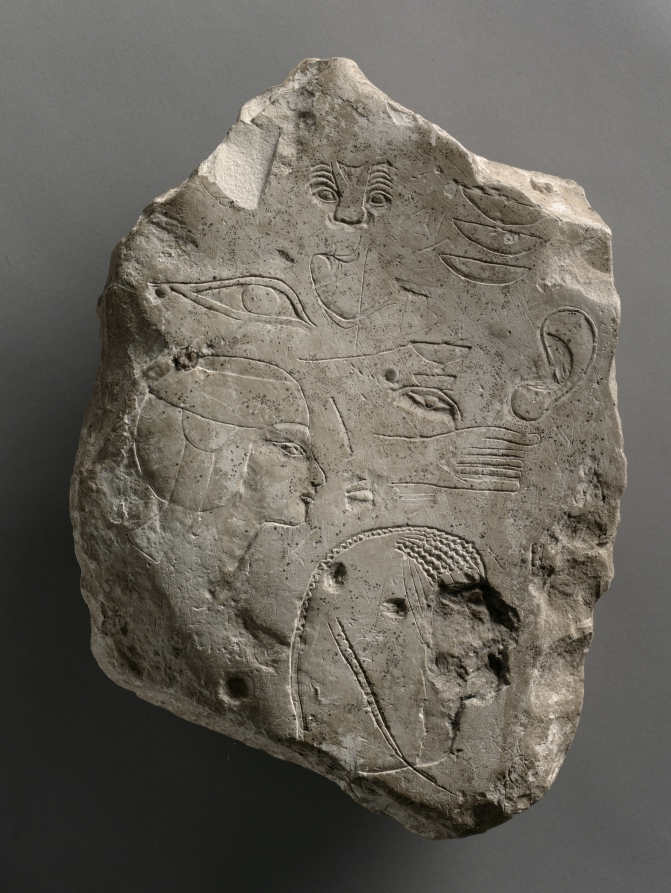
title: Trial Piece Worked on Both Sides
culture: Egypt, probably Thebes, New Kingdom (1540–1069 BCE), Dynasty 18, reign of Amenhotep III (1390–1352 BCE)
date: c. 1391–1353 BCE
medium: limestone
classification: Sculpture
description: This carved flake of limestone provides a fascinating glimpse of the ancient artist at work. One side, by far the better, features four studies of heads. At the upper left is an Asiatic. He has a low forehead, a prominent nose, and a long, pointed beard. To his right is a Nubian wearing the short, round headdress and large loop earring that the Egyptians usually identified with this ethnic group. The bottom row presents images from within Egypt. At the left is a stock image of a king. To his right is another Egyptian, whose clean-shaven head immediately identifies him as a priest. The rather routine, basic subjects of the other side show a far lower level of accomplishment. The sole details of any skill are the incomplete head of the god Bes at the bottom center and the human ear at the left edge. The simple neb-signs (baskets) are poorly executed, and the drawing of the hand is embarrassingly bad. At the lower right is a thickly banded human eye. Above that is the fair head of a princess wearing a short wig, wide headband, and thick sidelock. At the upper left are the beginnings (or the remains) of the bewigged head of a courtier, the face mostly obliterated.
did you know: Trial pieces were a necessity of this busy building period because new styles were continually introduced and rapid training of apprentices was needed.